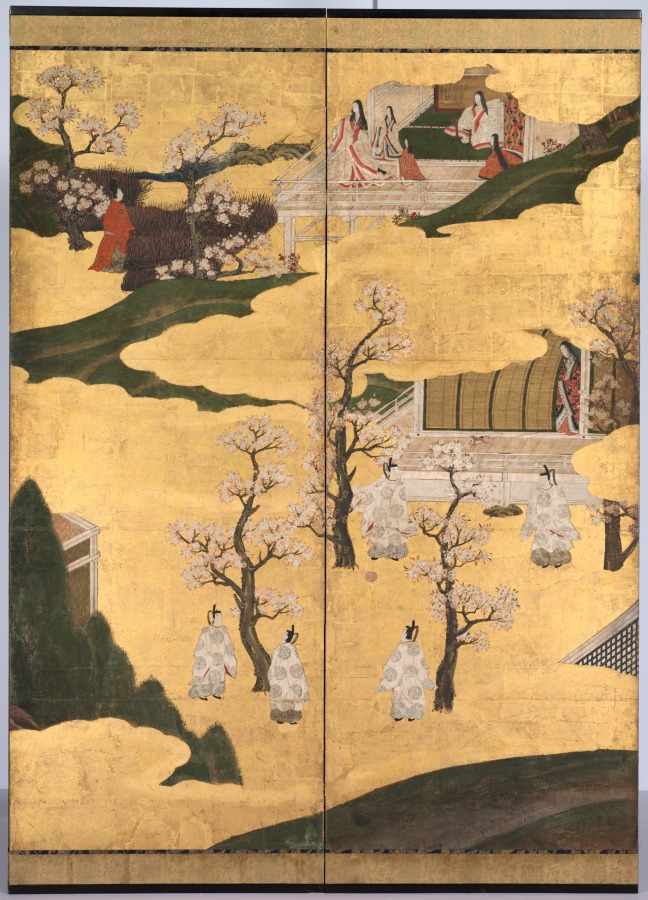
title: Scenes from the Tale of Genji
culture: Japan, Edo period (1615–1868)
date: late 1700s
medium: One of a pair of six-panel folding screens; ink and color on gilded paper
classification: Painting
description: Folding screens served as temporary dividers in traditional Japanese open-plan architectural spaces. This pair was inspired by Japan’s most celebrated work of literature, the Tale of Genji, written by Murasaki Shikibu, an attendant to the empress in the early 11th-century imperial court. The novel follows the love life of the “Shining Prince” Genji and delves into the psychological states of his many companions. Distinct episodes are nestled within a matrix of golden clouds and landscape elements. Each screen includes six episodes presented in a nonlinear fashion, capturing scattered highlights of the story.